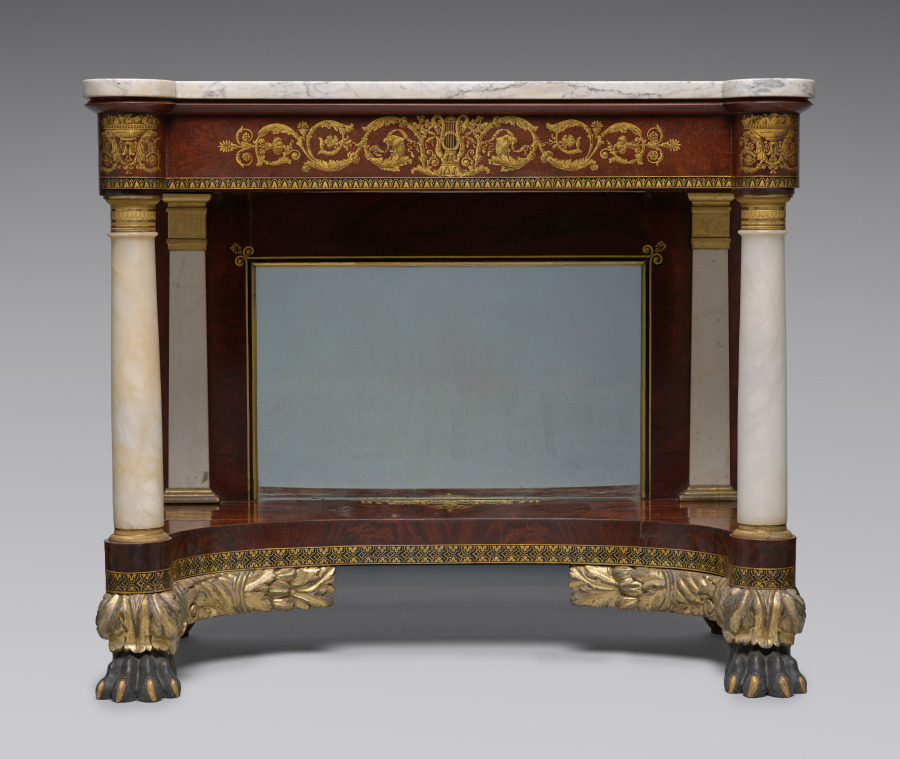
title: Pier Table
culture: America, New York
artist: Joseph Meeks and Sons (American)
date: c. 1829–35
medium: mahogany; marble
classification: Furniture and woodwork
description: Ornamental tables such as this marble-topped example were most often used in rooms on a narrow wall between two windows or just across from them on an opposite wall. Usually a gilded mirror hung above the table to create a single pier of glass, top to bottom, which reflected light around the room. This table’s bold use of carved and stenciled decoration, as well as expensive white marble, indicate that it was owned by a very wealthy family.